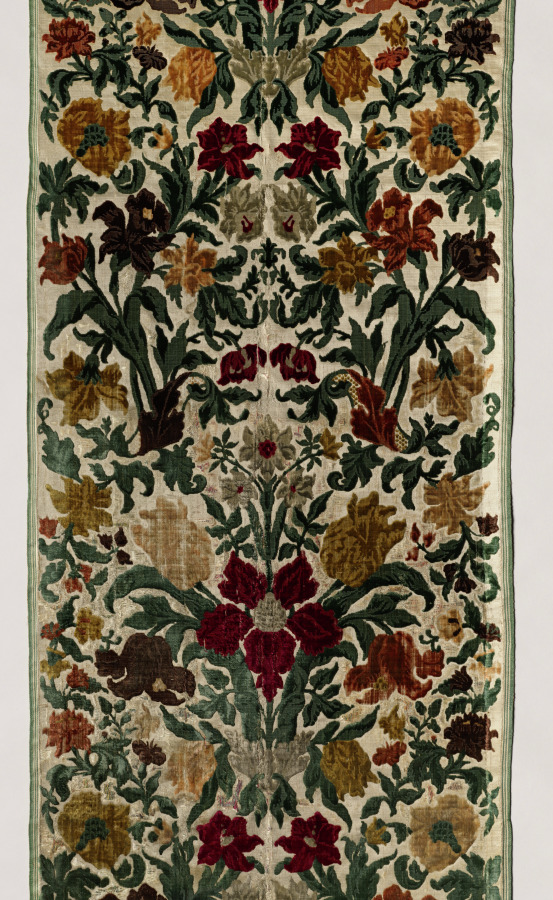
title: Length of Floral Velvet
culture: Italy, Genoa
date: 1600s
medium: velvet (cut, uncut, voided); silk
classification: Velvet